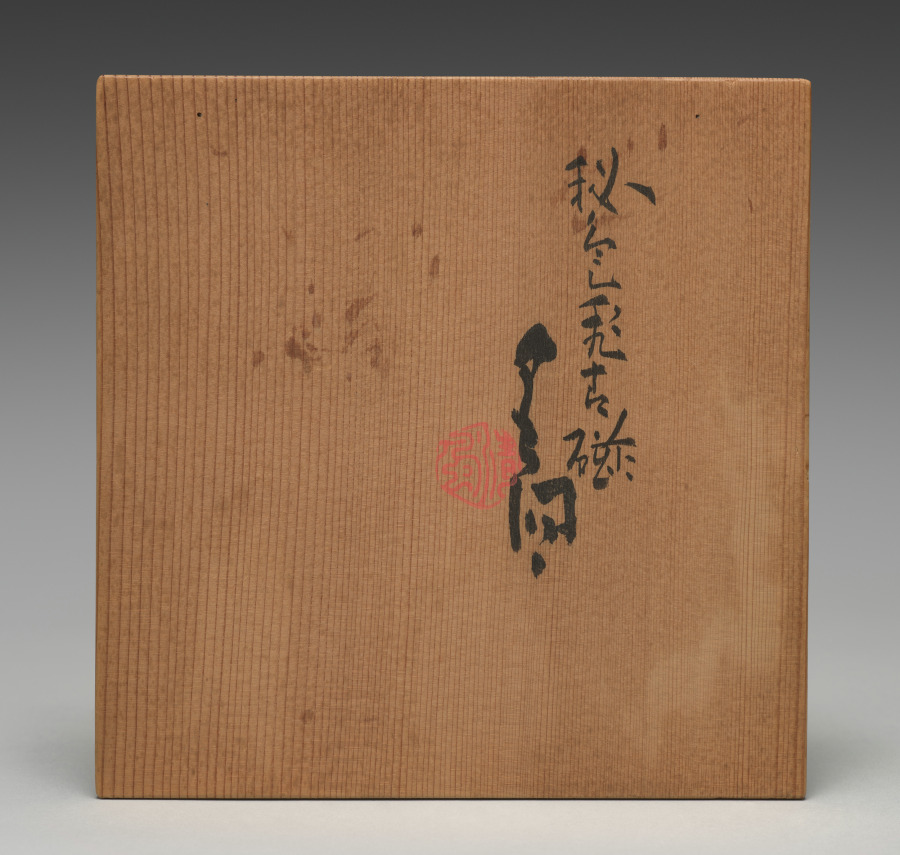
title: Dining Bowl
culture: Japan, Meiji period (1868–1912)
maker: Seifū Yohei III (Japanese, 1851–1914)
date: 1912–14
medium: Porcelain with green glaze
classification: Ceramic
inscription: 共箱の箱書：（蓋表）秘色彩古磁盂（印：清風）；（蓋裏）清風制之（印：帝室技藝員）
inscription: 彫銘：清風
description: This Yohei III dining bowl with an everted rim has a glaze identified in its box lid inscription as hisoku (C. mise), or “mysterious color.” This name typically refers specifically to a type of high-quality, green-glazed ceramic produced in the ninth and tenth centuries at the Yue kilns in China’s Zhejiang Province as tribute ware for the imperial family.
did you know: Many ceramics created by the Seifū Studio refer to and emulate Chinese ceramics in form and glazing.